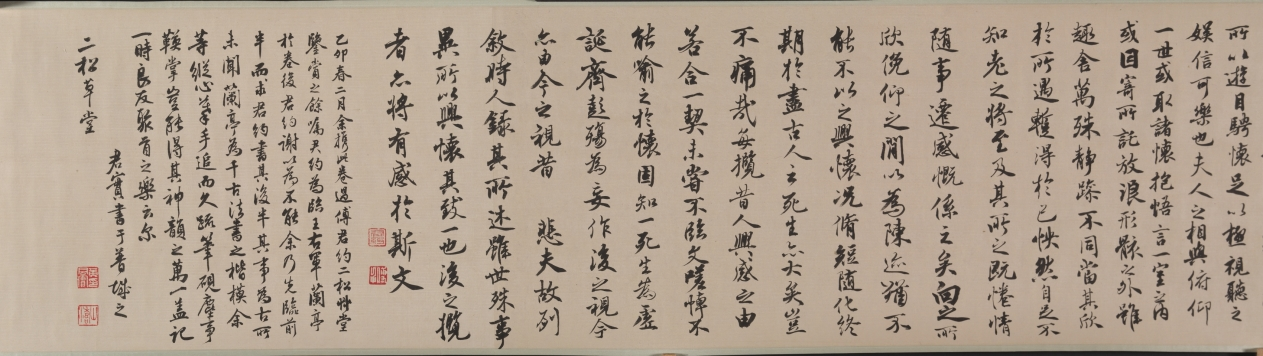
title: Purification at the Orchid Pavilion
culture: China, Qing dynasty (1644-1911)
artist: Fan Yi (Chinese, c. 1615–before 1688)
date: 1671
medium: Handscroll; ink and color on silk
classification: Painting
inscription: Artist's inscription, signature, and 2 seals: Painted by Fan Yi of Zhongfu during the second month of winter of the xinhai year [1671]. [2 seals] Fan Yi zhi yin, Zi yu yi.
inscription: Title on the frontispiece by Monk Yueshan (1629-1709).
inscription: 3 colophons and 13 additional seals: 1 colophon, dated 1707, and 6 seals of Yueshan; 2 colophons and 3 seals of Wong Kwan-Shut (Huang Junshi) 黃君實 (b. 1934); 2 seals of Fu Shen 傅 申 (b. 1937); 2 seals of Tessai Tomioka 富岡鐵齋 (1836-1924).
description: By the 1600s, the historic gathering at Lanting, Zhejiang province, in 353 CE was a common theme in Chinese painting. Originally based on a composition attributed to Li Gonglin (1049– 1106), now lost, Wu school artists revived the theme. Fan Yi, the brother of the artist Fan Qi from Nanjing, used delicate brushwork and luminous colors to depict the spring gathering.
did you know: The gathering’s host is in the Orchid Pavilion at the end of the scroll, representing an episode known as “Wang Xizhi Watching the Geese 王羲之觀鵝圖.”